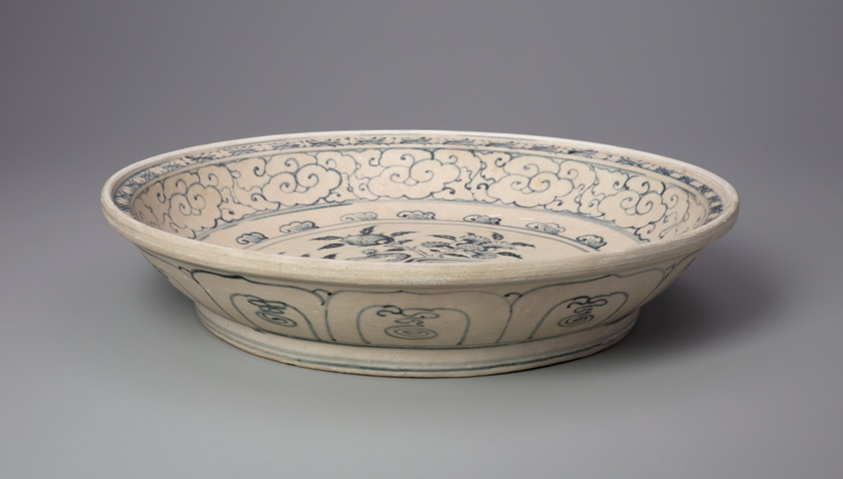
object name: Ceramics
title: Dish with Peacock and Floral Motif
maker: Vietnam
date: 15th century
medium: Glazed stoneware with cobalt-blue underglaze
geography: Vietnam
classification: porcelain; ceramics; asian art